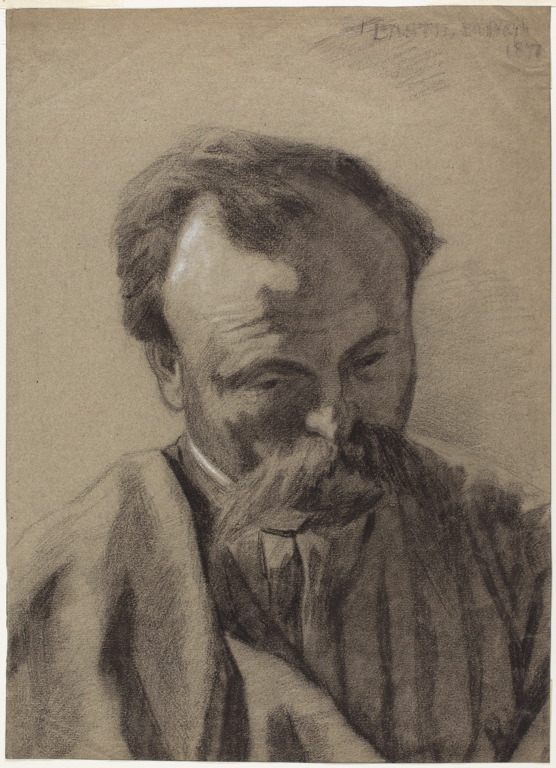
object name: Drawing and Watercolor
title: Self-Portrait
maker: Jules Bastien-Lepage (French, 1848-1884)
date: c. 1877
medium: Black chalk heightened with white chalk, on gray laid paper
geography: France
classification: chalk; drawings (visual works); prints and drawing